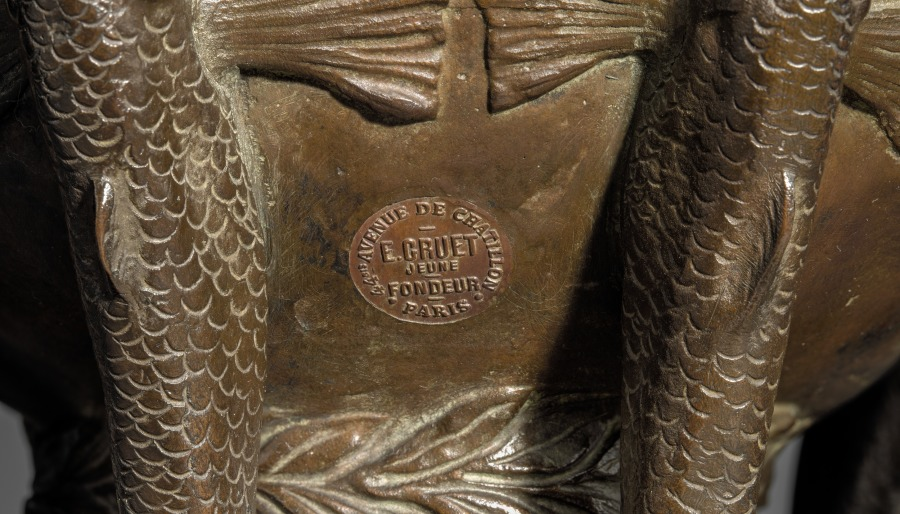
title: Pan of Rohallion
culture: America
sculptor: Frederick William MacMonnies (American, 1863–1937)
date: 1890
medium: bronze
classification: Sculpture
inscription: Signed on globe: Frederick MacMonnies, Paris 1890. © 1894. Inscribed around base: TO PAN OF ROHALLION ANNO DOMINI MDCCCLXL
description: Rohallion in the title refers to the name of an estate in New Jersey, whose owner commissioned MacMonnies to create a large fountain of this design for a garden pool. Later, the artist made several smaller versions, such as this example. Here, the ancient Greek god Pan plays his musical pipes while standing on an orb supported by fish.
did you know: The character of Peter Pan, including his flute playing, references the Greek god Pan.